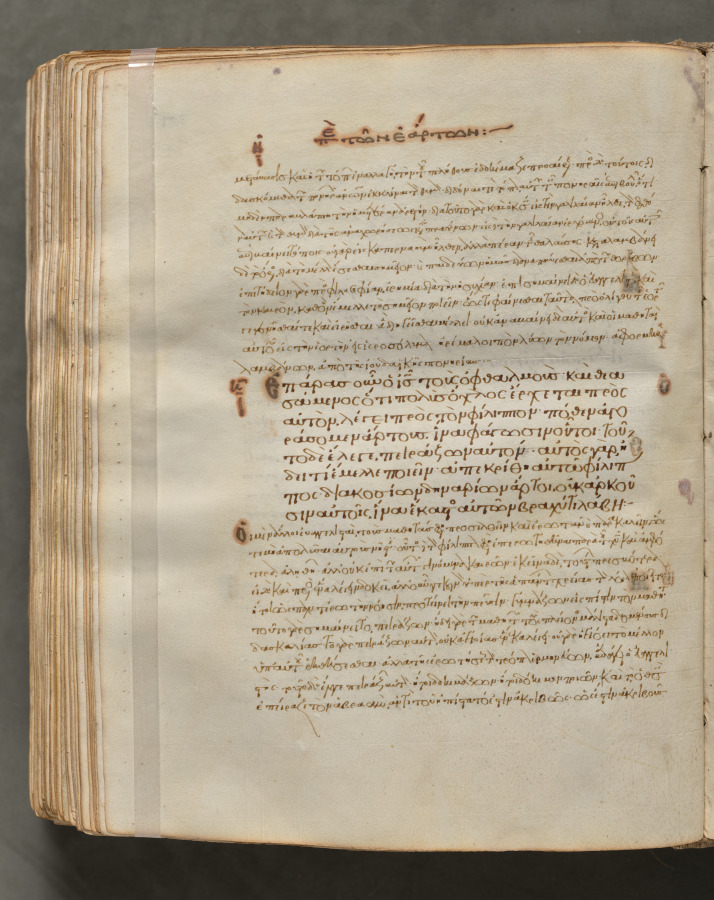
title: Text, folio 348 (verso), from a Gospel Book with Commentaries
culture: Byzantium, Constantinople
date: c. 1000–1100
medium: ink, tempera, and gold on vellum; leather binding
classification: Bound Volume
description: Each of the four gospels in this book opens on a page with brilliantly illuminated borders depicting the author of the text as well as birds—principally peacocks, symbols of the immortality of the soul—and fountains, representing the fountain of life and the salvation of the soul. This volume consists of 428 leaves with texts in Greek. Its level of sophistication suggests that it was probably written and decorated in a monastery in Constantinople.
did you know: Gospel books were carried in procession through Byzantine churches.